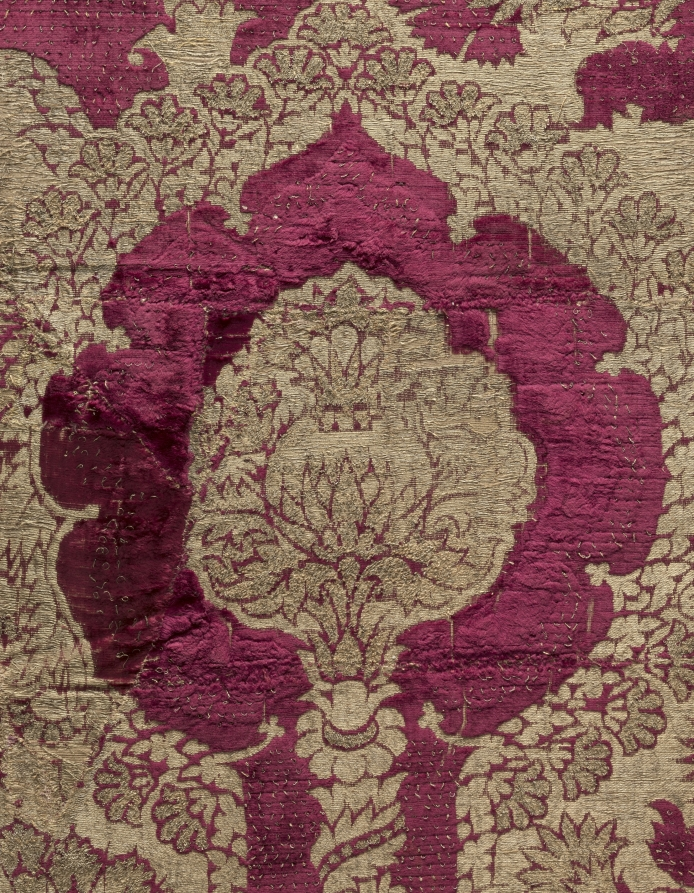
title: Velvet with Pomegranate Pattern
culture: Italy, Florence, 15th century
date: 1450–1500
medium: silk, gold thread; velvet: three heights of cut pile, gold thread loops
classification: Velvet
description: This extravagant Italian velvet with three heights of lush crimson pile is lavishly embellished with gold-thread loops. Large pomegranate patterns such as this were fashionable in Europe for more than a century, about 1420 to 1550, and were often featured in paintings and in large wall tapestries. Variations occurred in pattern details, pile height, and gold thread. Since pomegranates symbolized eternity, fertility, and resurrection, these velvets were often used in Roman Catholic churches. This pomegranate pattern inspired the cope, or cloak, worn by the Archbishop of Canterbury when he officiated the royal wedding of Prince William and Kate Middleton in 2011.